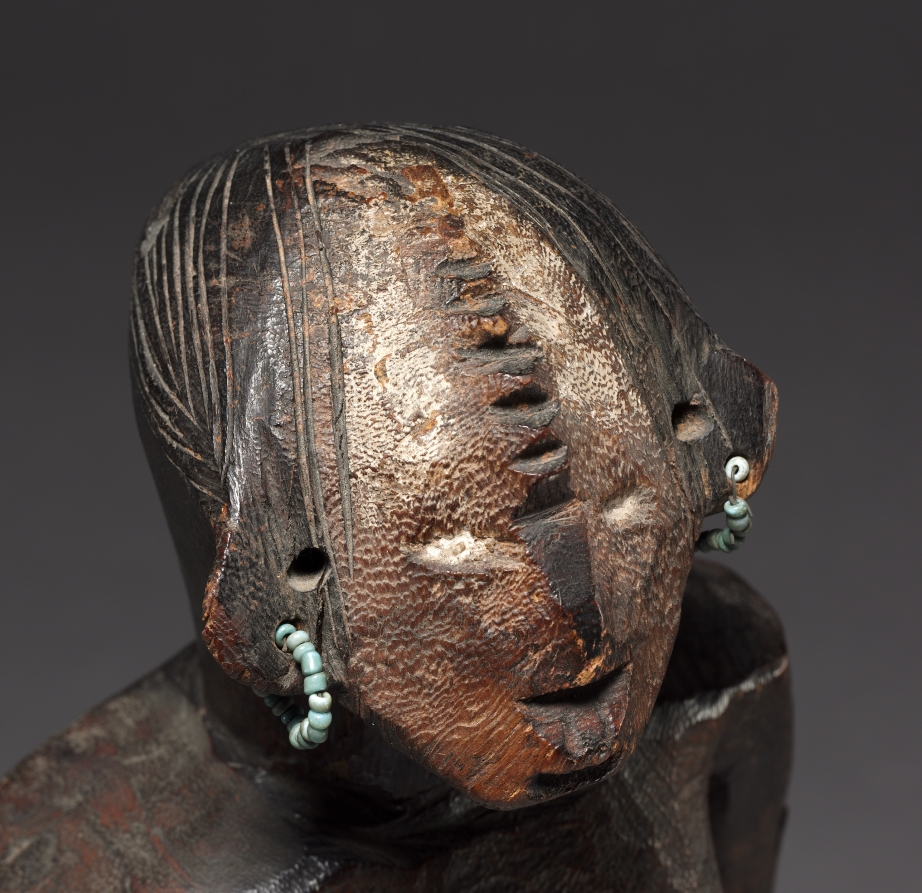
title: Female Figure of a Pair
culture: Africa, Central Africa, Democratic Republic of Congo, probably Ngbandi-style carver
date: late 1800s-early 1900s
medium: Wood, iron alloy, glass beads, plant fiber, and cloth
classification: Sculpture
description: Carving of paired figures is quite well documented among the Ngbandi and its neighbors the Ngbaka-Minagende, where such sculptures are said to represent the mythical ancestor Seto and his sister-wife, Nabo. Field-based research cannot confirm the existence of figurative couples among the Ngbandi.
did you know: Odette Delenne, the collector of this pair, said that these figures reminded her of herself and her husband, René.